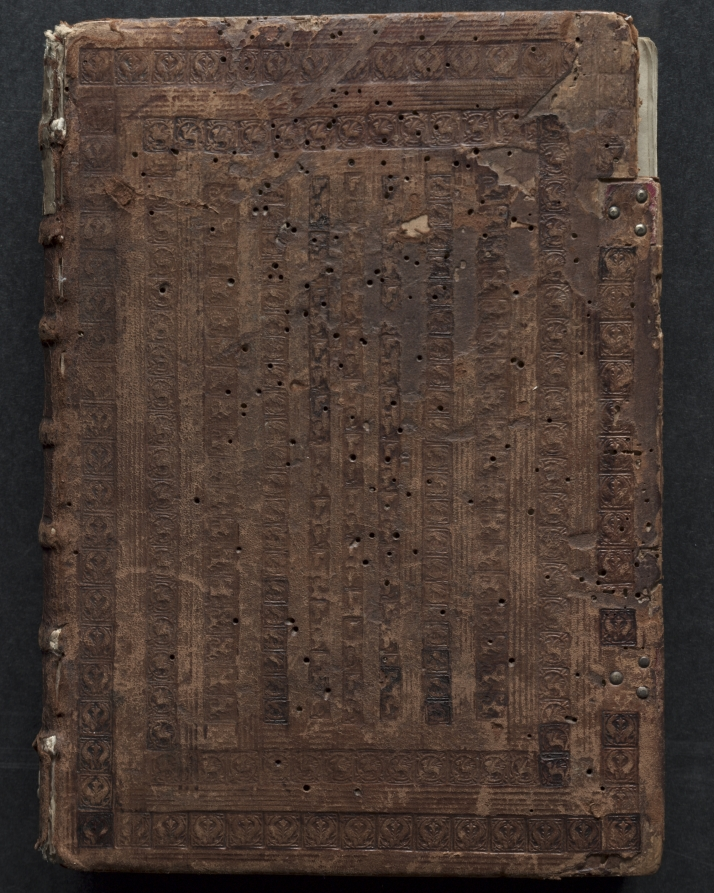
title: The Gotha Missal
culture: France, Paris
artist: Master of the Boqueteaux (French)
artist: and Workshop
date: c. 1375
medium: ink, tempera, and gold on vellum; blind-tooled leather binding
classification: Bound Volume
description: The style and quality of this manuscript's decoration is typical of deluxe Parisian books made for aristocratic or royal patrons. Most of the book's decoration appears to be the work of the Master of the Boqueteaux, an artist active at the court of King Charles V (died 1380). His style was apparently shared by a number of book illuminators working in and around Paris. It is very possible that the Gotha Missal belonged to Charles V, but is not provable because the manuscript has no royal portraits and lacks a colophon. Given the book's magnificent decoration, however, it would seem that it was produced for a Valois prince, if not for the king himself. The manuscript receives its name from the German dukes of Gotha, its later owners.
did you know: The artist received his name because of his tendency to draw trees that resembled little mushrooms.